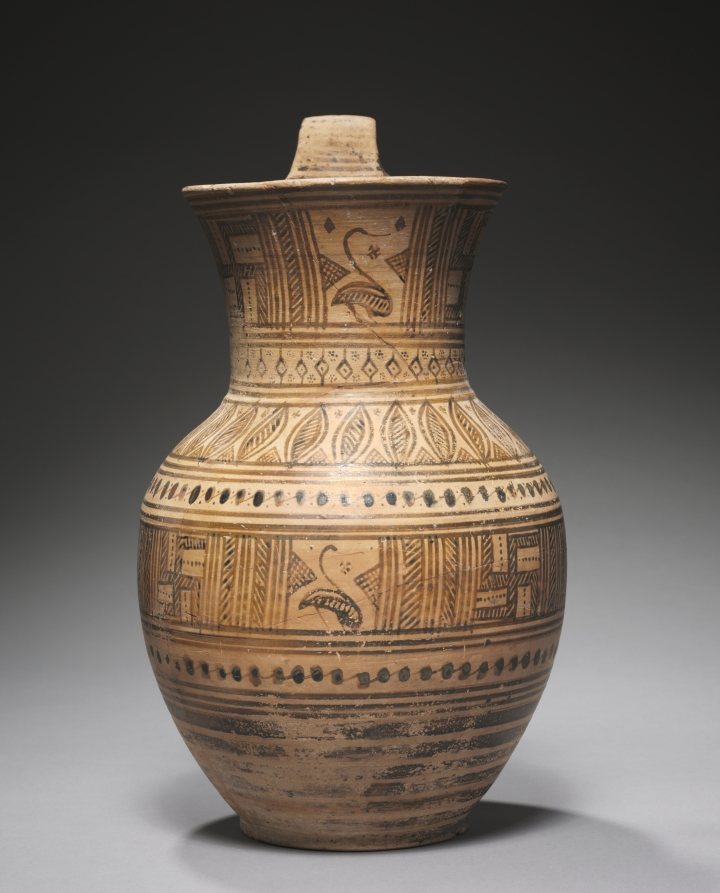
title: Geometric Pitcher: Swans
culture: Greek, Attic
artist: attributed to Swan Painter (Greek, Attic, Late Geometric Ib-IIa)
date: c. 740–730 BCE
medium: ceramic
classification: Ceramic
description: A common shape in the Late Geometric period, the pitcher often attains large dimensions, offering the painter multiple zones for decoration. Here, standing leaves encircle the shoulder, while the neck and body bear wide bands with alternating squares of swans and swastikas. Also known as a hooked cross, the swastika appears frequently as a decorative motif in Greek Geometric pottery, without any clear meaning. The swans, though somewhat abstracted to modern eyes, likely represent one of many waterfowl species native to Greece.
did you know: The stylized swans lend their name to the otherwise anonymous decorator of this vase.